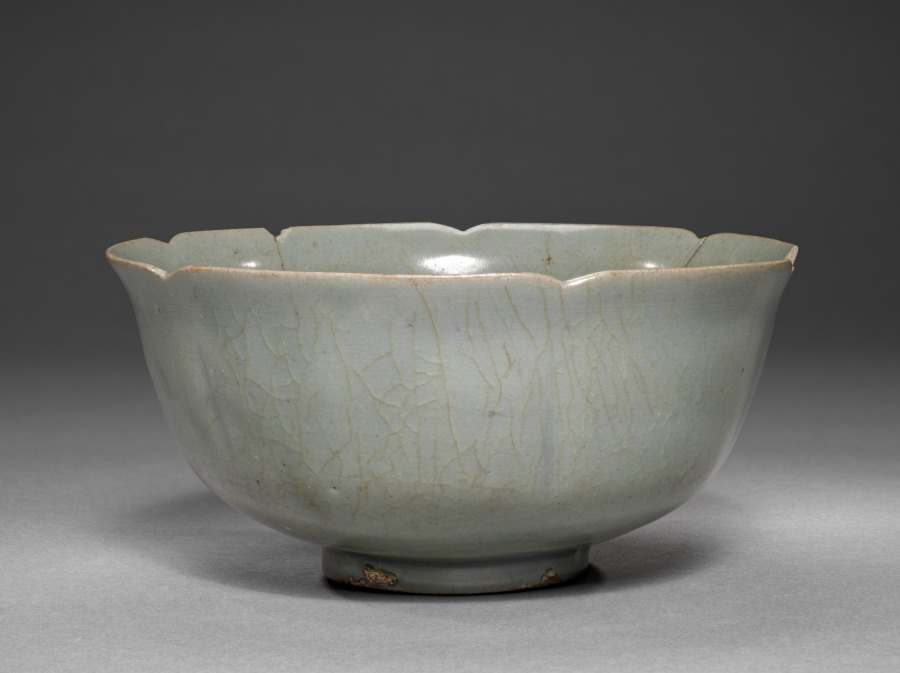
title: Floral-shaped Bowl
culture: Korea, Goryeo dynasty (918–1392)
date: 1100s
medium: Ceramic, glazed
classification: Ceramic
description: Celadons, spoons, seals, and bronze mirrors were the most common burial objects in tombs during the Goryeo period (918–1392). Furnishing tombs with an elaborate assemblage of objects was believed to honor and comfort the newly dead. Generally, Goryeo tombs were left untouched until the late 19th century. During the colonial period (1910–45), however, Japanese archaeologists competitively excavated the tombs located in Kaeseong, the former capital of the Goryeo period. This elegant floral-shaped cup was probably one of those grave goods excavated during the Japanese colonial period.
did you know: Elites of the Goryeo period are known for their love of drinking tea and wine. This type of delicate-looking cup not only made their drinking experience more enjoyable, but also showed their refined taste.